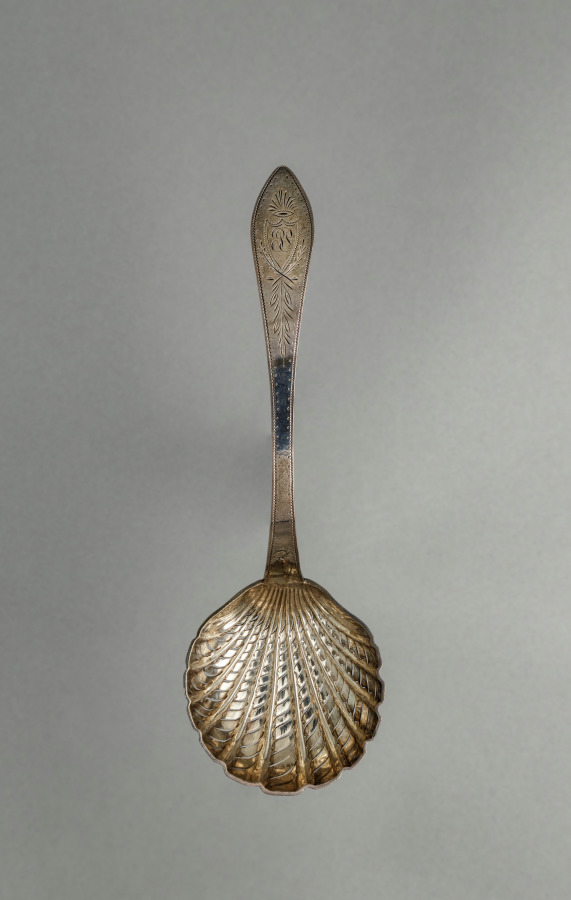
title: Sugar Spoon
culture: France, 19th century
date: 1819–1838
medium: silver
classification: Silver